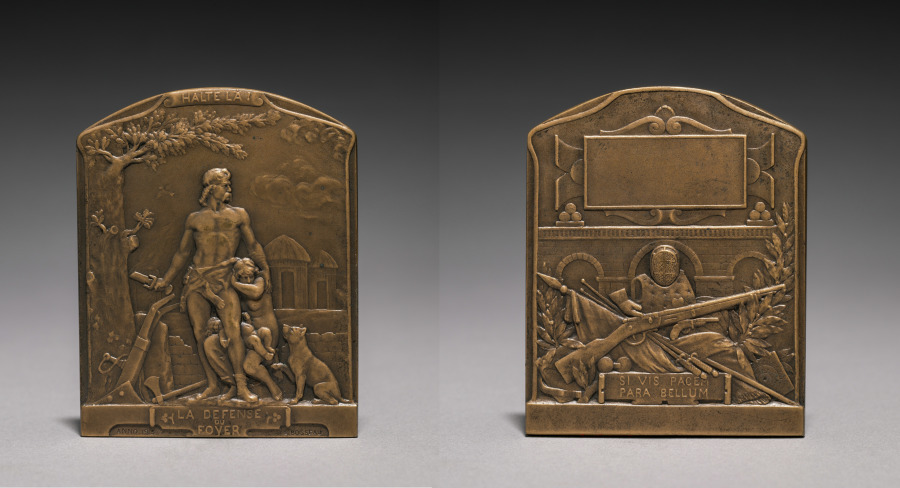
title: Medal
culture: France, 20th century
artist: Emile André Boisseau (French, 1842–1923)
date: 1914–1918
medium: bronze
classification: Metalwork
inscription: above: "Halte là"; below: "La defense du foyer."